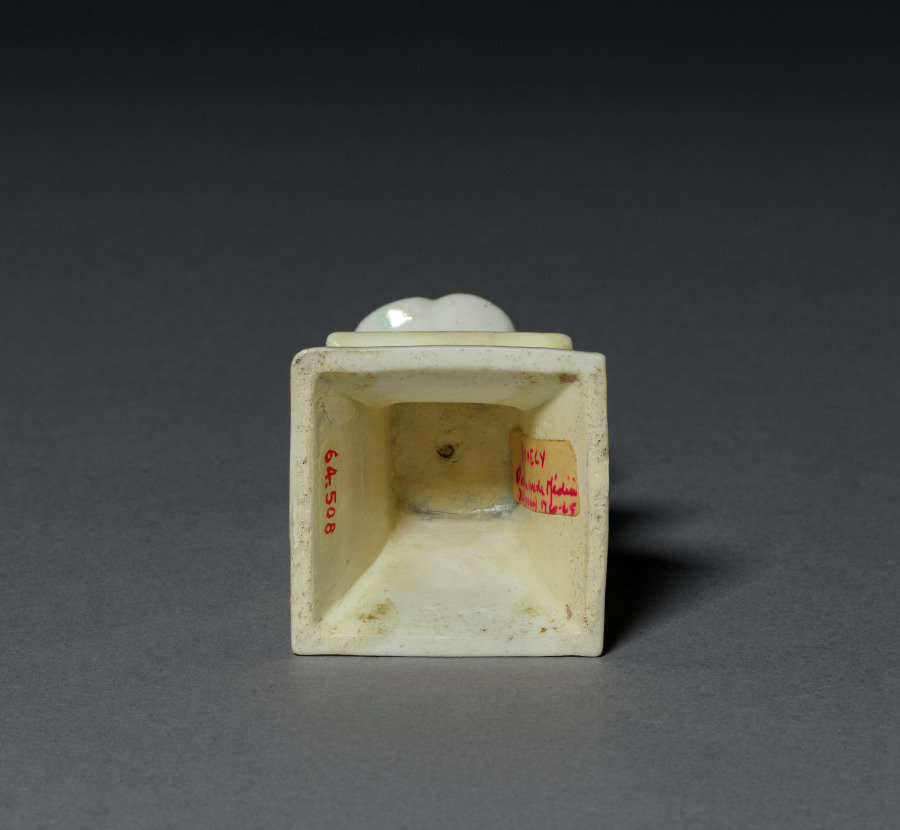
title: Medici Vase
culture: France, Mennecy, 18th century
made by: Mennecy Factory (French)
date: c. 1760–1765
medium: soft-paste porcelain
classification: Ceramic